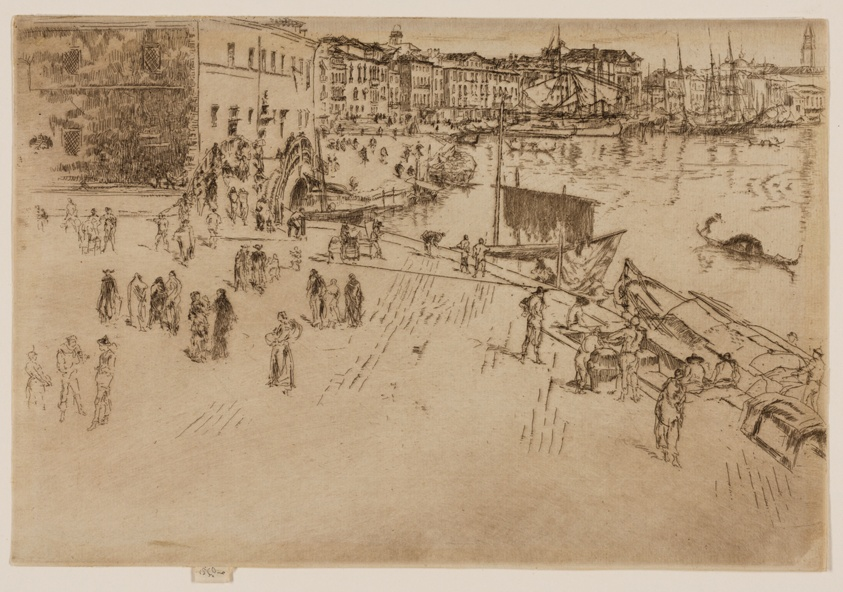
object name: Print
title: The Riva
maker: James McNeill Whistler (American, 1834-1903)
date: 1879/80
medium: Etching and drypoint with foul biting in brown ink on ivory laid paper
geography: United States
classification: etching; engraving; print; prints and drawing; paper; drypoint